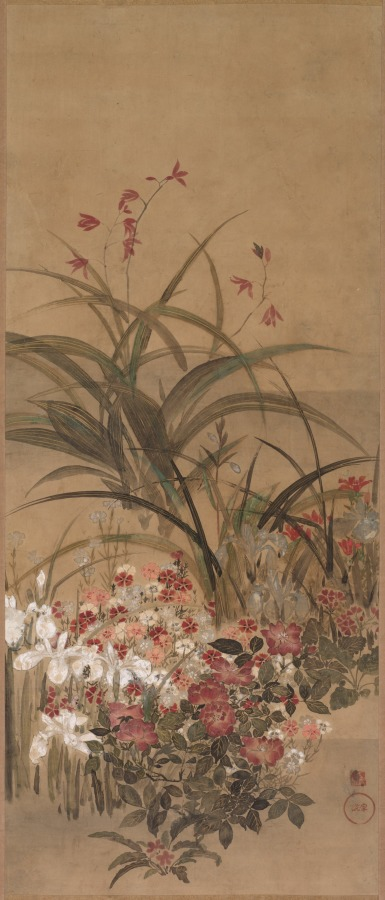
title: Summer Flowers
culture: Japan, Edo period (1615–1868)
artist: Kitagawa Sōsetsu (Japanese, active 1639–50)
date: mid-1600s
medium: hanging scroll; ink, color, and gold on paper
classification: Painting